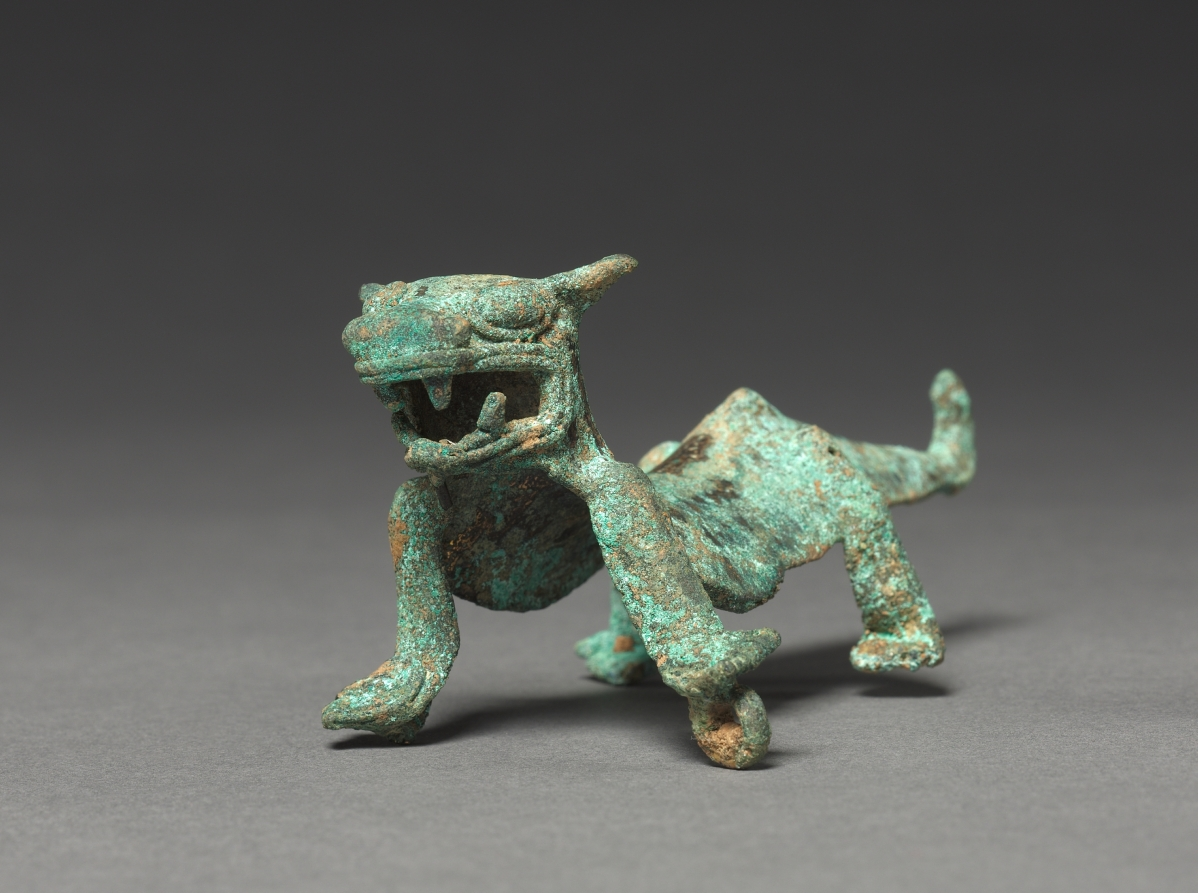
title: Jaguar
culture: Costa Rica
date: c. 1000–1500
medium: gold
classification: Metalwork